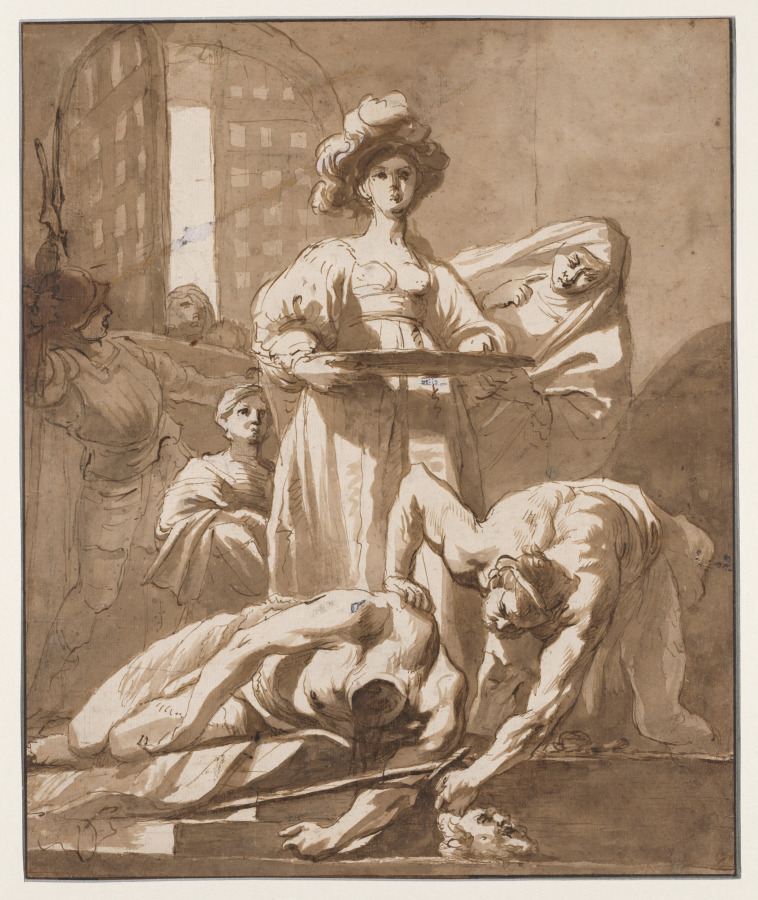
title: Salome with the Head of John the Baptist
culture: Netherlands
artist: Nicolaus Knupfer (Dutch, 1603–1655)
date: c. 1650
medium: pen and brown ink, brown washes and white heightening (oxidized), over black chalk on antique laid paper; framing lines in pen and brown ink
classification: Drawing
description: The Utrecht artist Nicolaes Knupfer was known for depicting powerful women who outsmarted or overpowered men. This drawing, probably a study for a painting, depicts the New Testament story of Salome, who was granted a wish by King Herod after dancing for him. Encouraged by her mother, Herodias, Salome asked for the head of John the Baptist, against whom Herodias bore a grudge for objecting to her marriage to the king. The scene shows the theatrical moment after the beheading, when a stoic Salome holds a salver to receive the head.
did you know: The stoic Salome in this drawing awaits the head of John the Baptist so that she can deliver it to King Herod on a salver.